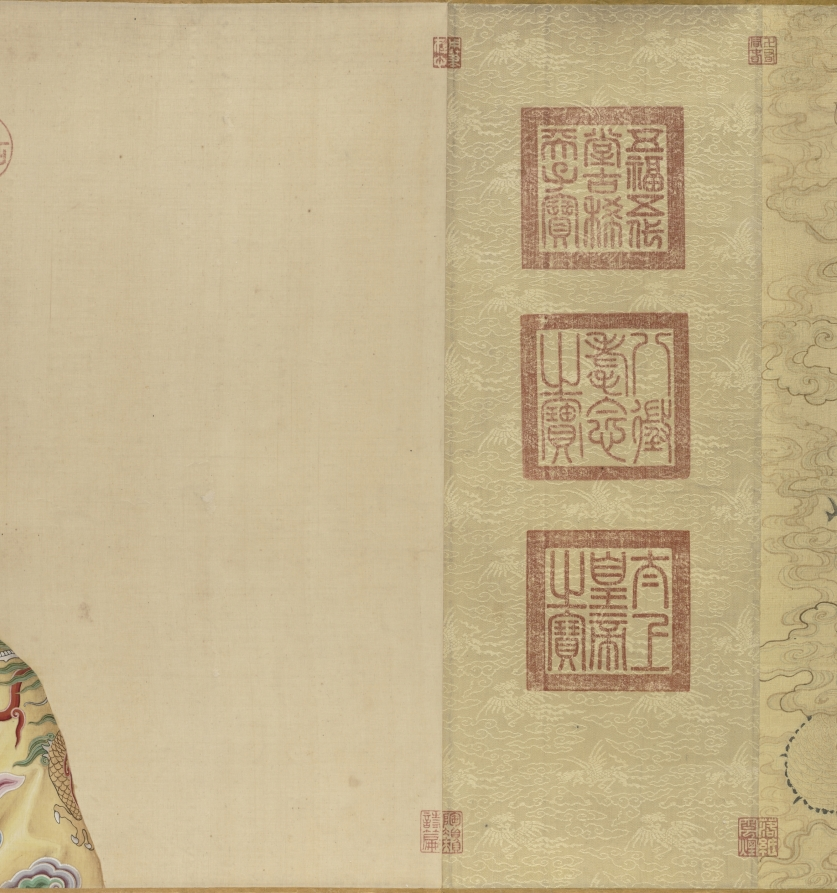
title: Portraits of the Qianlong Emperor and His Twelve Consorts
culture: China, Qing dynasty (1644–1911), Qianlong reign (1736–95)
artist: Giuseppe Castiglione (Italian, 1688–1766)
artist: and others (Chinese)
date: 1736–70s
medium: Handscroll; ink and color on silk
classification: Painting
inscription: 9 seals of the Qianlong emperor (r. 1736–95).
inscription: The eighth month, first year of Qianlong [1736] 乾隆元年八月吉日. The Empress (Xiaoxian) 皇后 (1712–1748), The Guifei (Huixian) 貴妃 (?-–1745), Chunfei 純妃 (1713–1760), Jiafei 嘉妃 (?–1755), Lingfei 令妃 (1727–1775), Shufei 舒妃 (1728–1777), Qingbin 慶嬪 (1724–1774), Yingbin 穎嬪 (1731–1800), Xinbin 忻嬪 (?–1764), Dunfei 惇妃 (1746–1806), Xunfei 順妃 (1749–1788), Shunbin 循嬪 (?–1797).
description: This portrait shows the Qianlong emperor at 26, in the first year of his reign. His likeness is followed by portraits of the empress and eleven consorts. Their portraits document the appearances of the court women around the time when they received their respective imperial titles, which occurred at different stages of the emperor's life. The first three portraits were done by the Jesuit (Roman Catholic) missionary artist Giuseppe Castiglione, whereas the later ones were by Chinese court painters. Formal portraiture contributed to the affirmation of status and construction of role and identity. This scroll served as both familial documentation and a "mind picture" of the Qianlong emperor, suggesting that his constructed image of emperorship was inseparable from concepts of self and family. It was stored in a carved red lacquer box bearing the original painting title Mind Picture of a Well-Governed and Tranquil Reign (see CMA 1969.32).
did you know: Lingfei 令妃 (1727–1775), the first consort depicted in the maroon or “incense-colored" 香色 robe, was the mother of six of Qianlong’s children, including the future Emperor Jiaqing.